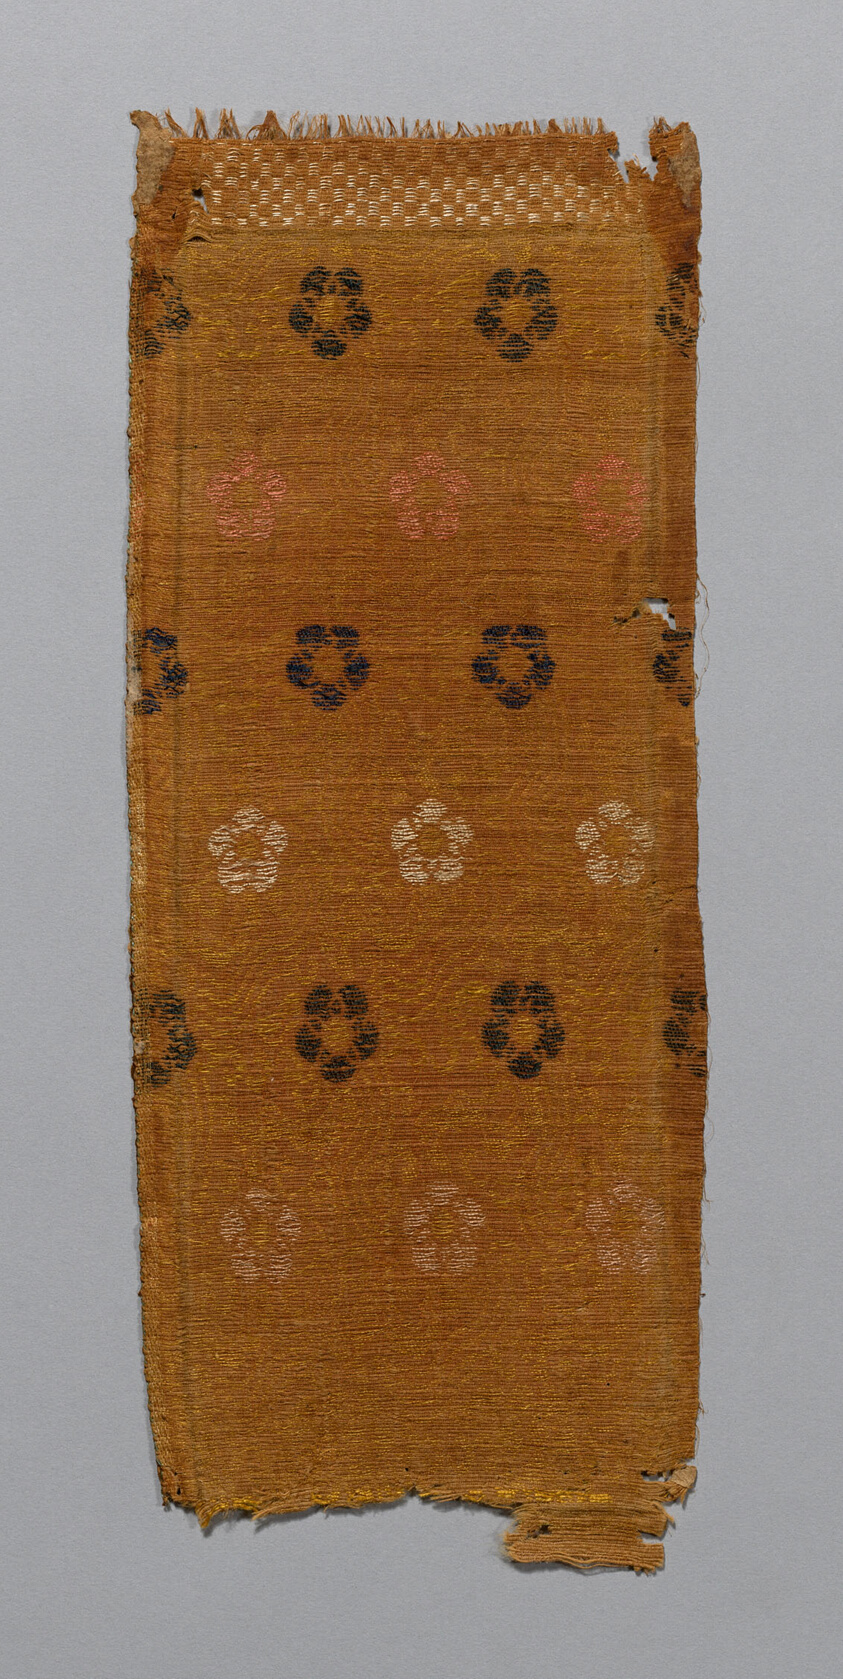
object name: Textile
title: Sutra Cover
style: ming, Chinese (culture or style), East Asian, asian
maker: China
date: Ming dynasty (1368–1644), c. 1590s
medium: Silk and cotton, warp-float faced 3:1 broken twill weave with supplementary patterning wefts some bound in 1:3 'S' twill interlacings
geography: China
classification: textile; weaving